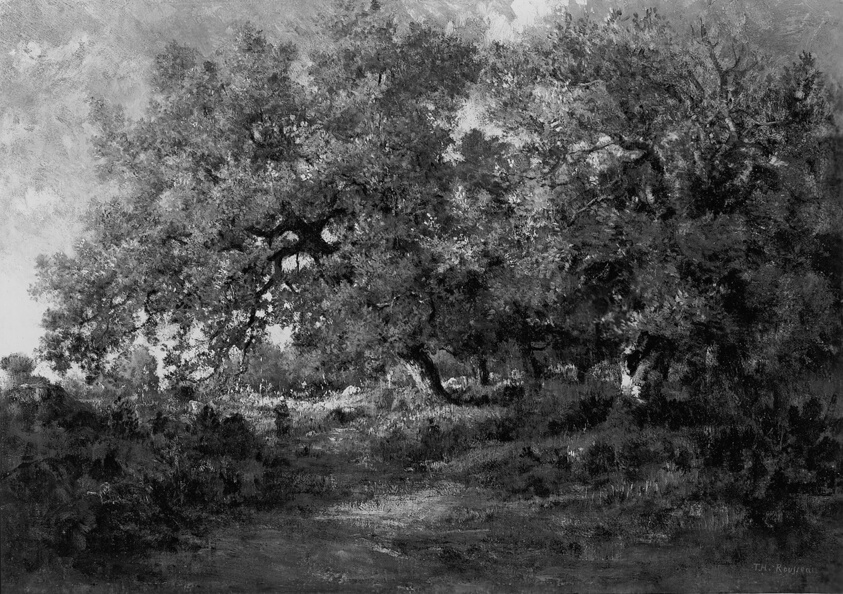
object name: Painting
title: Landscape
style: nineteenth century, 19th century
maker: Théodore Rousseau (French, 1812–1867)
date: c. 1860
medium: Oil on panel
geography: France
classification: painting; oil on panel; paint; oil paintings (visual works); french; european painting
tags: landscape, paths, wilderness, weather/seasons, trees, sky, nature, landscapes, foliage, clouds